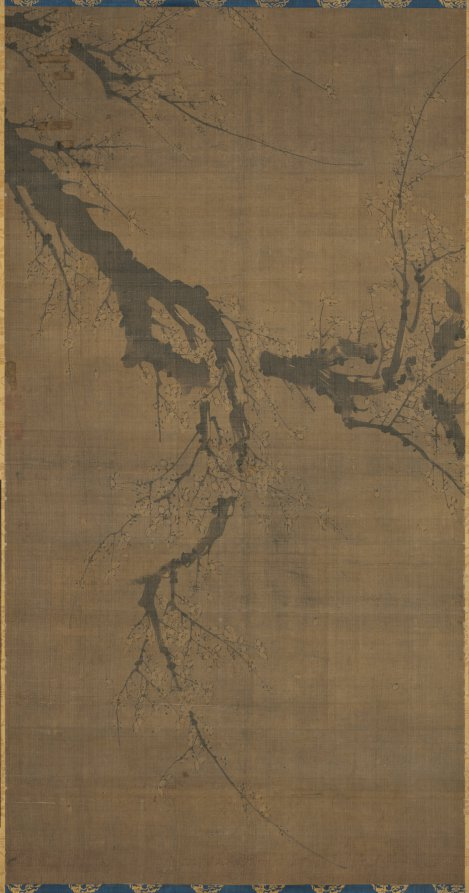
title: Ink Plum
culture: China, Ming dynasty (1368–1644)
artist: Peng Xu (Chinese, active 1488–1521)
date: late 1400s–early 1500s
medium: hanging scroll, ink on silk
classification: Painting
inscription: Artist's 2 seals at left middle edge of painting: Peng shi Te-mien; Shih-chu.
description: Seasonal paintings, including those depicting flowering plum trees in early spring, furnished scholars’ studios or other interior spaces in the house. Peng Xu is considered the foremost follower of the famous plum blossom painter Wang Mian (1287–1359) (see CMA 1974.26). The branches are brushed in the same vigorous manner leaving white streaks in the ink indicating the gnarled bark. The delicate blossoms are drawn in fine lines, while a gray wash covers the entire surface, only leaving the flower petals in reserve.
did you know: Plum trees blossom in the first months of the year; the delicate flowers endure the harsh winter frosts. A popular motif in Chinese ink painting, the plum symbolizes the winter season and is a harbinger of spring.